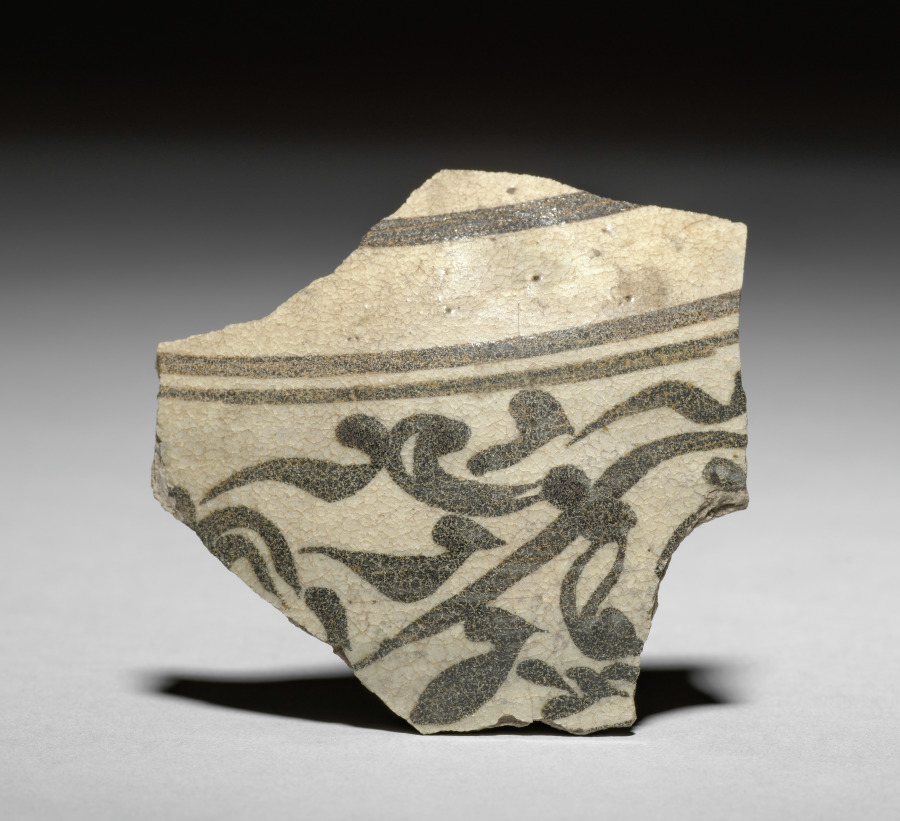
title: Pottery Fragment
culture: Siam, Sawankhalok ware, 15th century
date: 1400s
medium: stoneware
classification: Ceramic